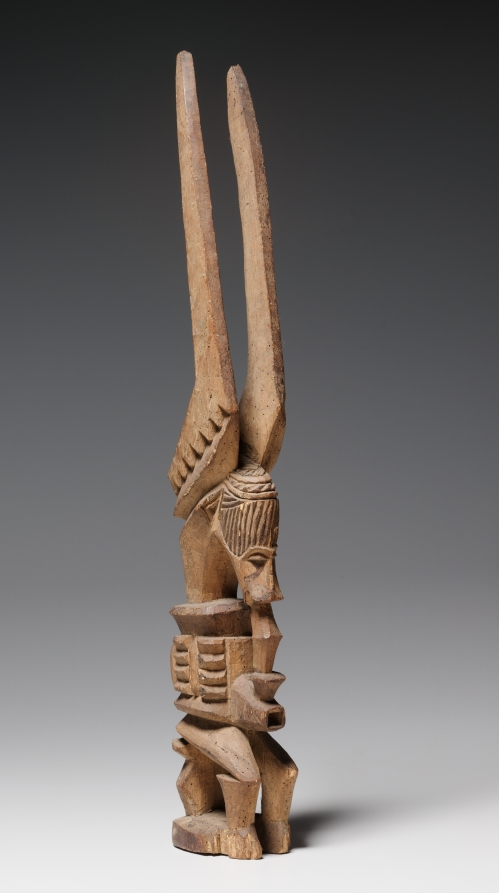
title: Shrine Figure (Ikenga)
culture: Africa, West Africa, Nigeria, Igbo style, unknown carver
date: early 1900s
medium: wood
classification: Sculpture